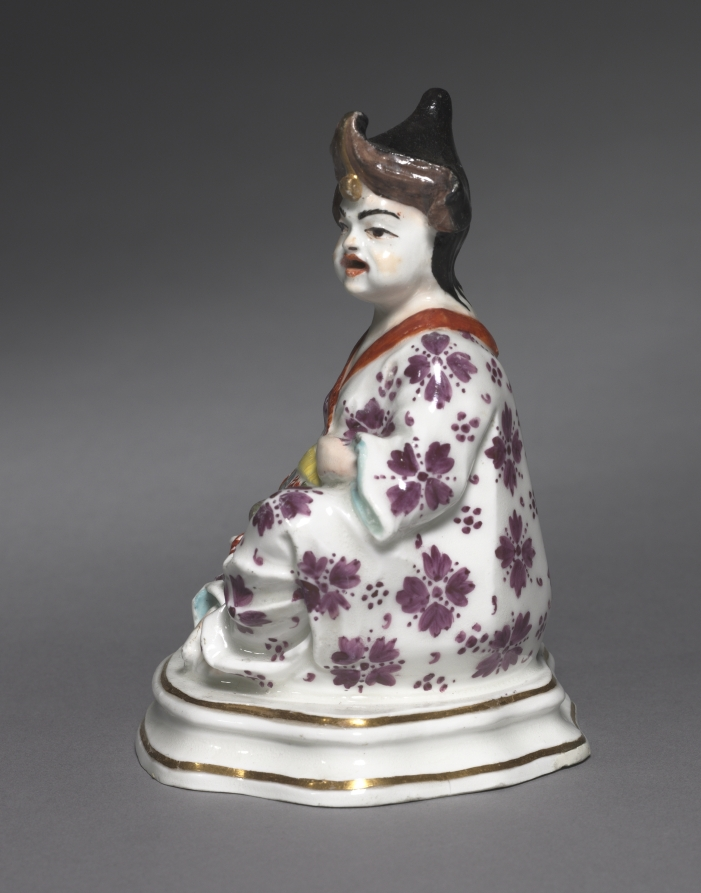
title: Seated Chinese Figure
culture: Germany, Meissen, 18th century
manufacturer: Meissen Porcelain Factory (German, est. c. 1710)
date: c. 1730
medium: porcelain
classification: Ceramic